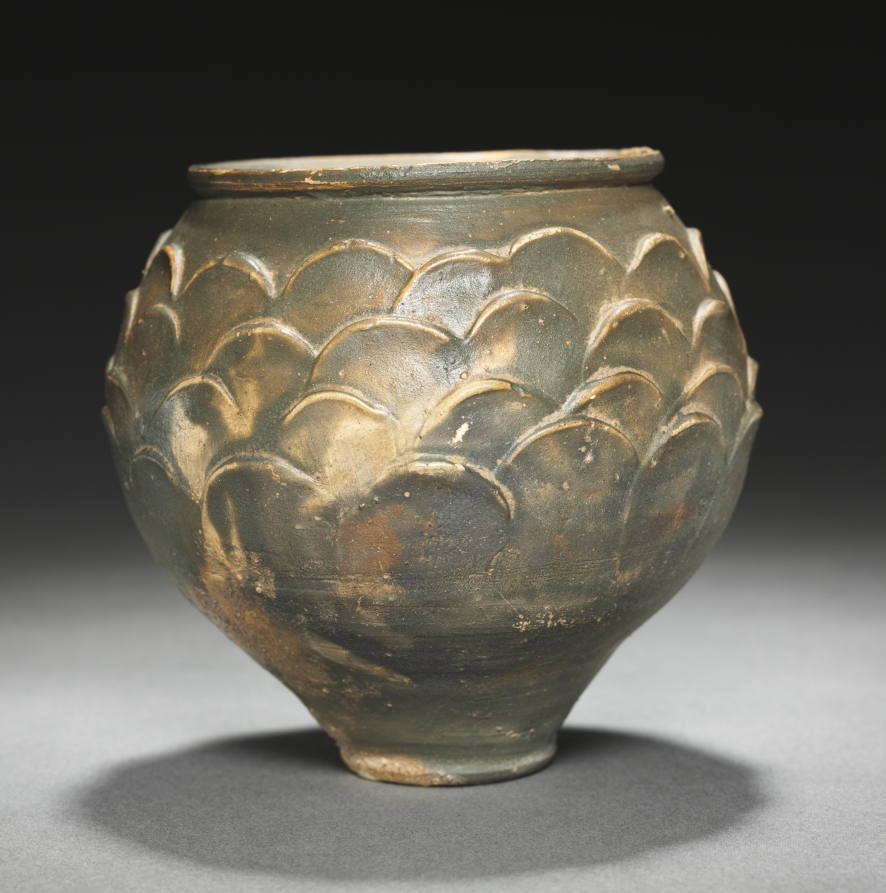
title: Beaker with Scale Pattern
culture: Rhenish (Cologne), Gallo-Roman, 1st Century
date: 1–100 CE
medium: reddish ware with dark gray burnished slip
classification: Ceramic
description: The dark brown glaze on the exterior of this beaker is patchy and irregular, allowing the light red clay beneath to show through. The glaze is especially light on the ridges of the raised scales that decorate the upper body of the vessel, arranged in four offset rows. The pattern was created by applying thick clay slip to the surface of the beaker after it was removed from the potter’s wheel.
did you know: Several textile fibers were found inside this beaker, suggesting that it may have contained an object or objects wrapped in cloth when it was buried.